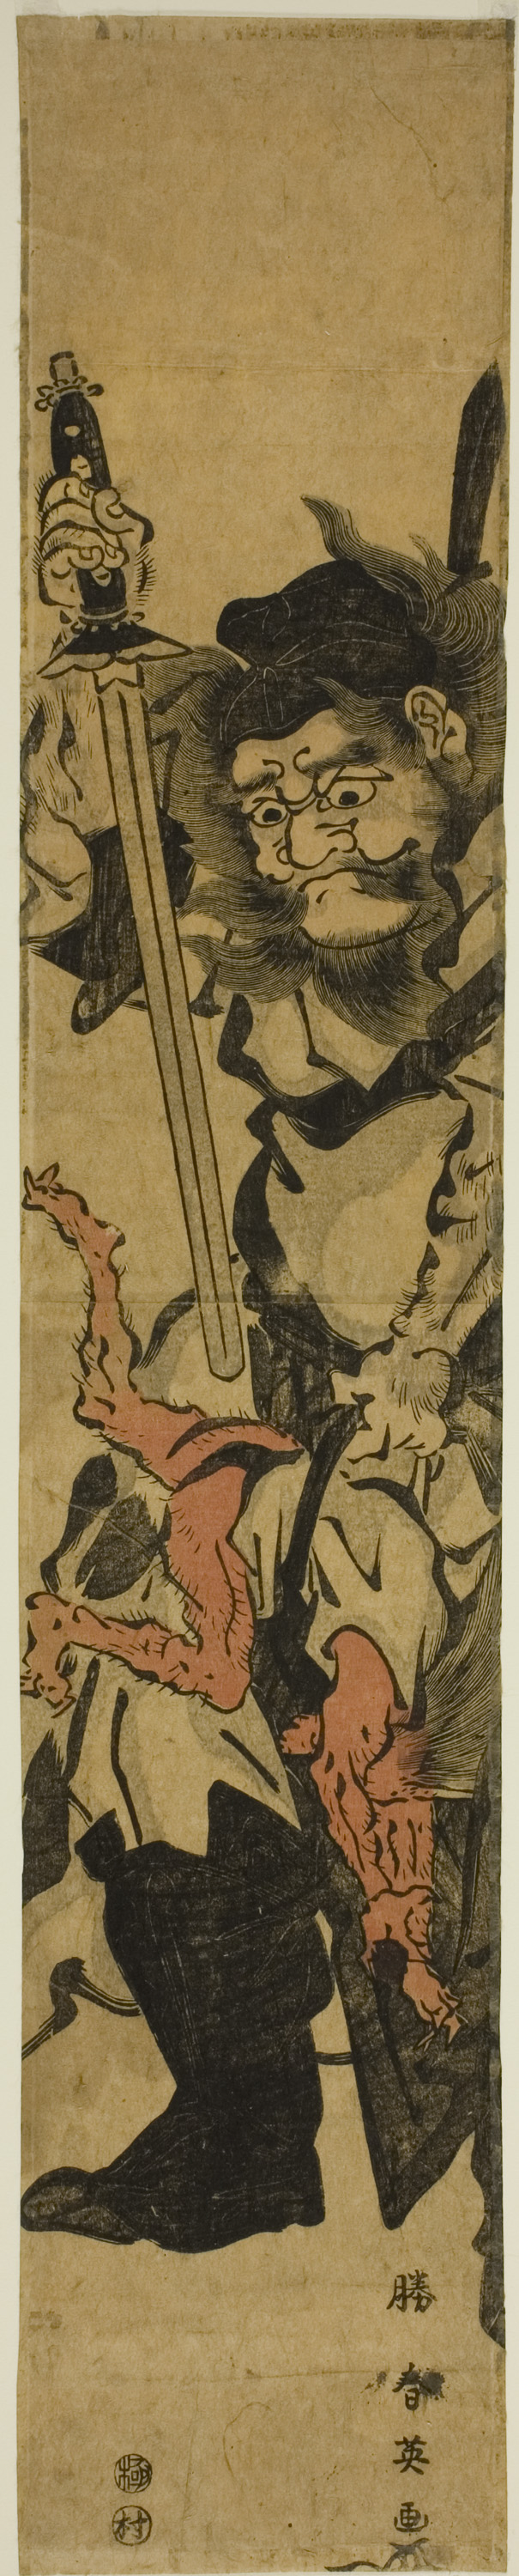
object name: Print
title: Shoki the Demon Queller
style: Japanese (culture or style)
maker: Katsukawa Shun'ei (Japanese, 1762-1819)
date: c. 1793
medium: Color woodblock print; hashira-e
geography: Japan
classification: woodblock print; print; asian art